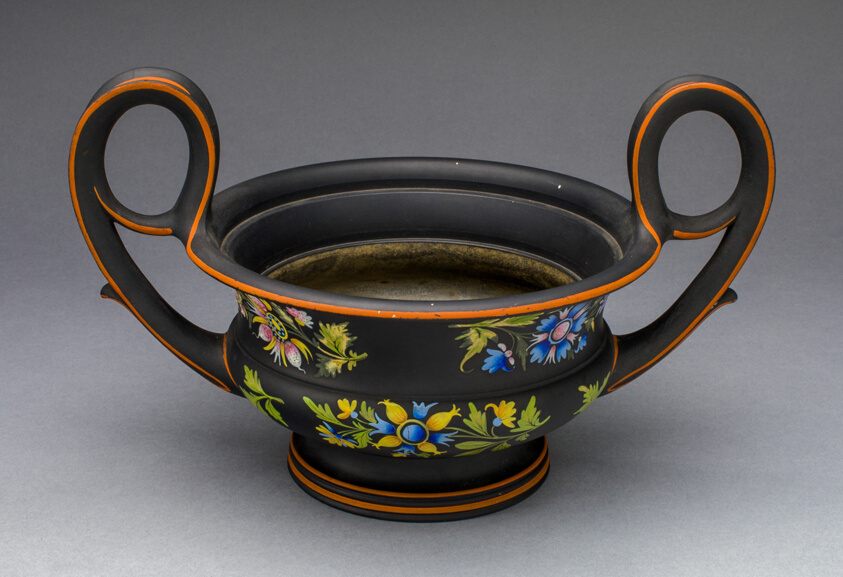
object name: Ceramics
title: Flower Holder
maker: Wedgwood Manufactory (England, founded 1759)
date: c. 1815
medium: Stoneware (basaltware)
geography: Burslem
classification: ornamental piece; stoneware; european decorative arts; ceramics